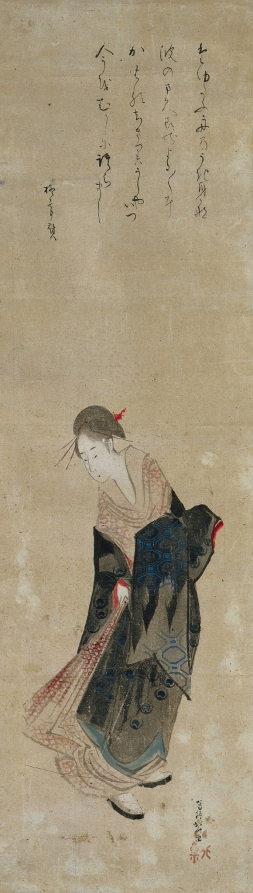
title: Beauty (Bijin)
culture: Japan, Edo period (1615–1868)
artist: Katsushika Hokusai (Japanese, 1760–1849)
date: c. 1775–1849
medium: hanging scroll; ink and color on paper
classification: Painting